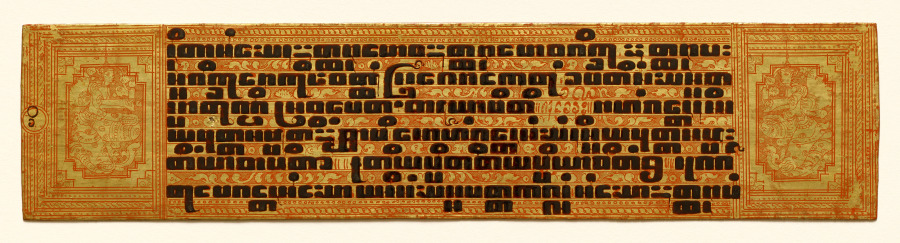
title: Text and illumination, folio 15 (verso) from a Kammavacha: Buddhist ordination text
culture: Myanmar (Burma)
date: 1800s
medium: Leaf: lacquer and gilding on cloth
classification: Manuscript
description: In premodern Burma, lay people commissioned lavishly ornamented manuscripts for ceremonial occasions, when officiants would read aloud from the text. Written in black lacquer, the text is in the language of Pali written in a Burmese script. It contains ordination rites and procedures for monastic ceremonies. The second to last page is covered with intricately drawn, winged celestial beings (nats) in gestures of praise. They fly amid intertwining vegetation—denoting bounty—that grows from serpentine forms that refer to rain clouds. Lionlike forms inhabit the space with them. The top and bottom covers are equally ornamented with jeweled floral patterning.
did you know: The Pali text of this manuscript is written in Burmese square script, which is also known as "tamarind seed script."